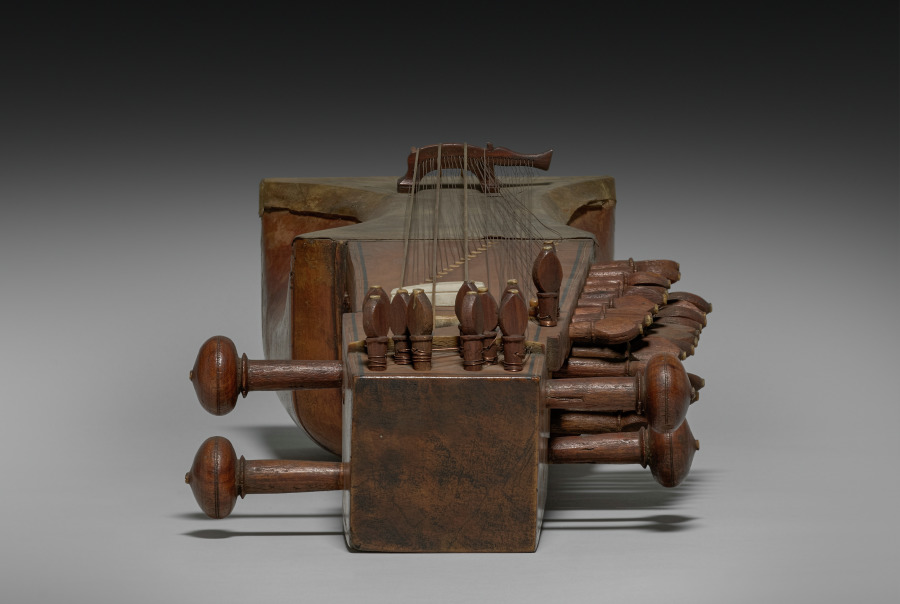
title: Sarangi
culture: India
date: 1800s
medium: Wood, parchment, bone or ivory, wood inlays, gut, and copper strings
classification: Musical Instrument